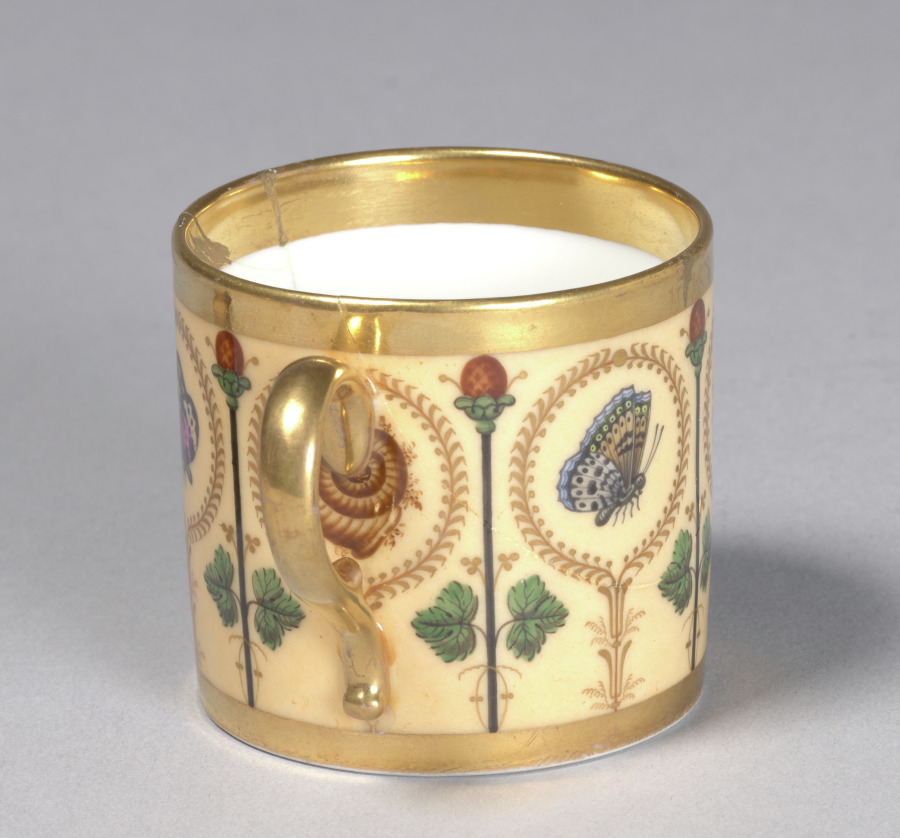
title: Cup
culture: France, 19th century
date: c. 1800–1810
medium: porcelain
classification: Ceramic